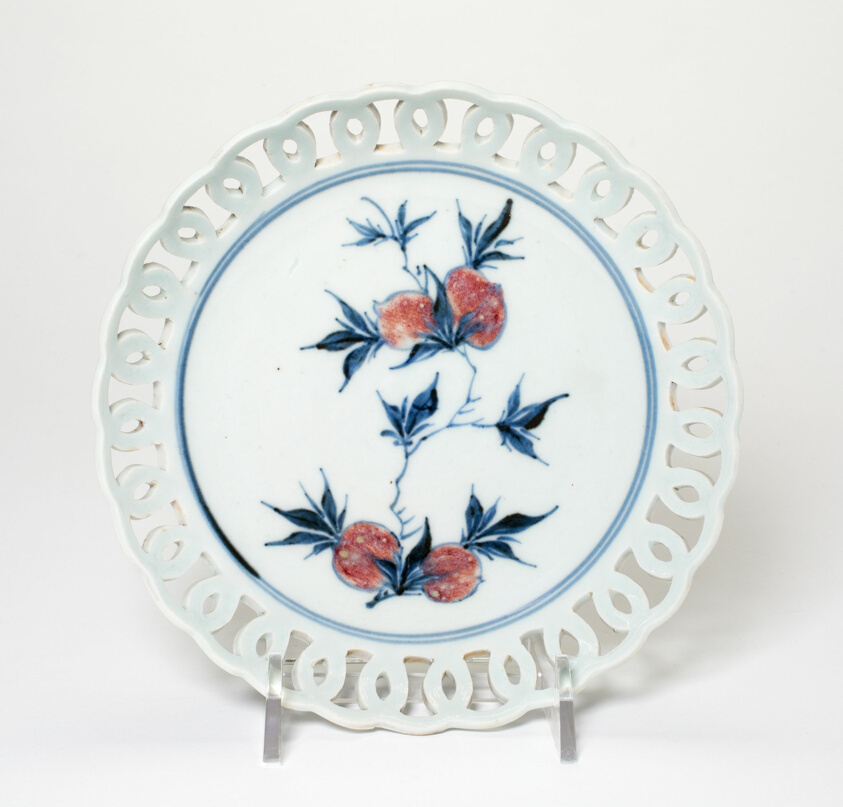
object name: Vessel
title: Dish with Openwork Rim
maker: China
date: Ming dynasty (1368–1644), Tianqi period (1621–27)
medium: Porcelain painted in underglaze blue and copper red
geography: China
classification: porcelain; asian art; ceramics